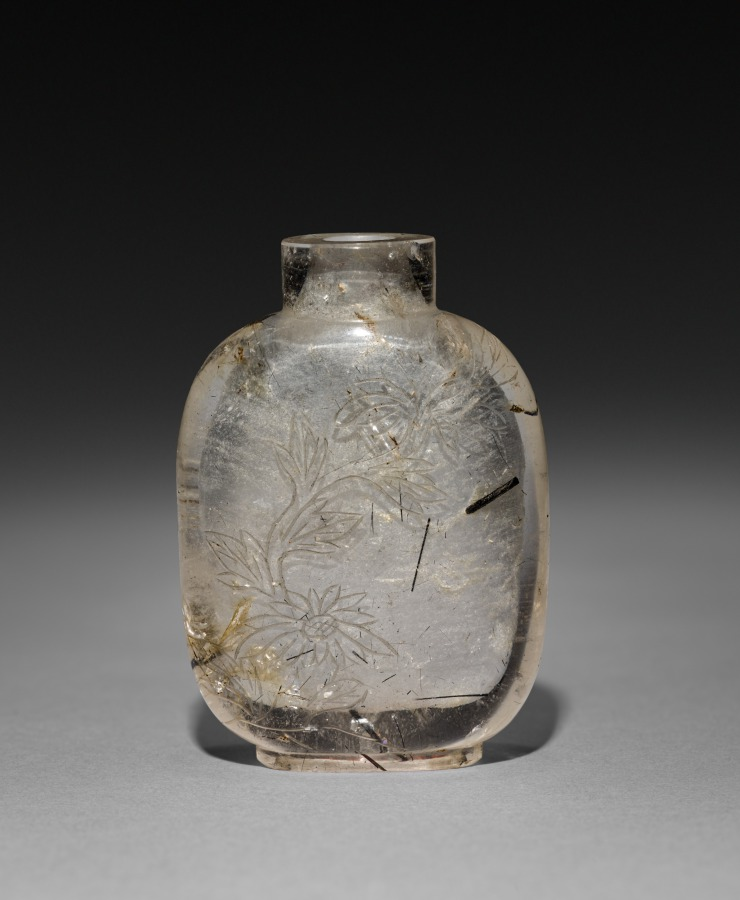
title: Snuff Bottle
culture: China, Qing dynasty (1644-1911)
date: 1644–1911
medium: glass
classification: Glass